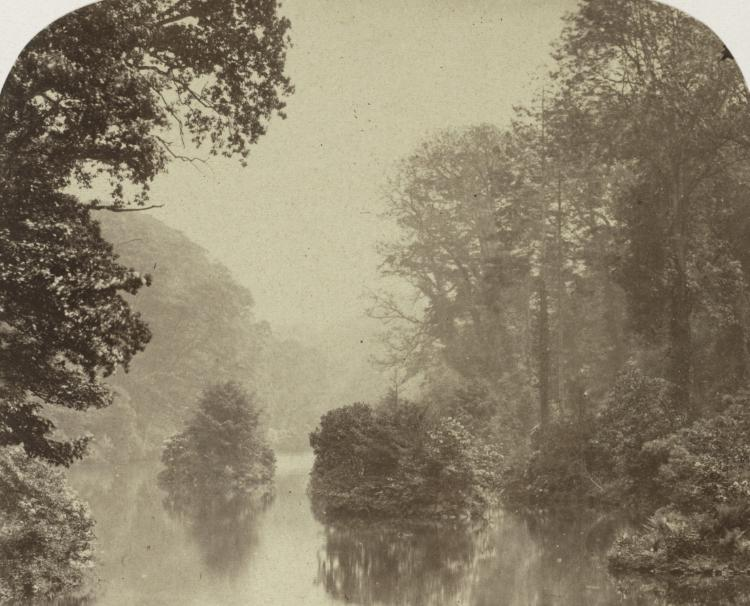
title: Evening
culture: England, 19th century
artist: James Knight (British)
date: 1855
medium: albumen print from wet collodion negative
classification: Photograph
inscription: Written in pencil on verso: "1695"